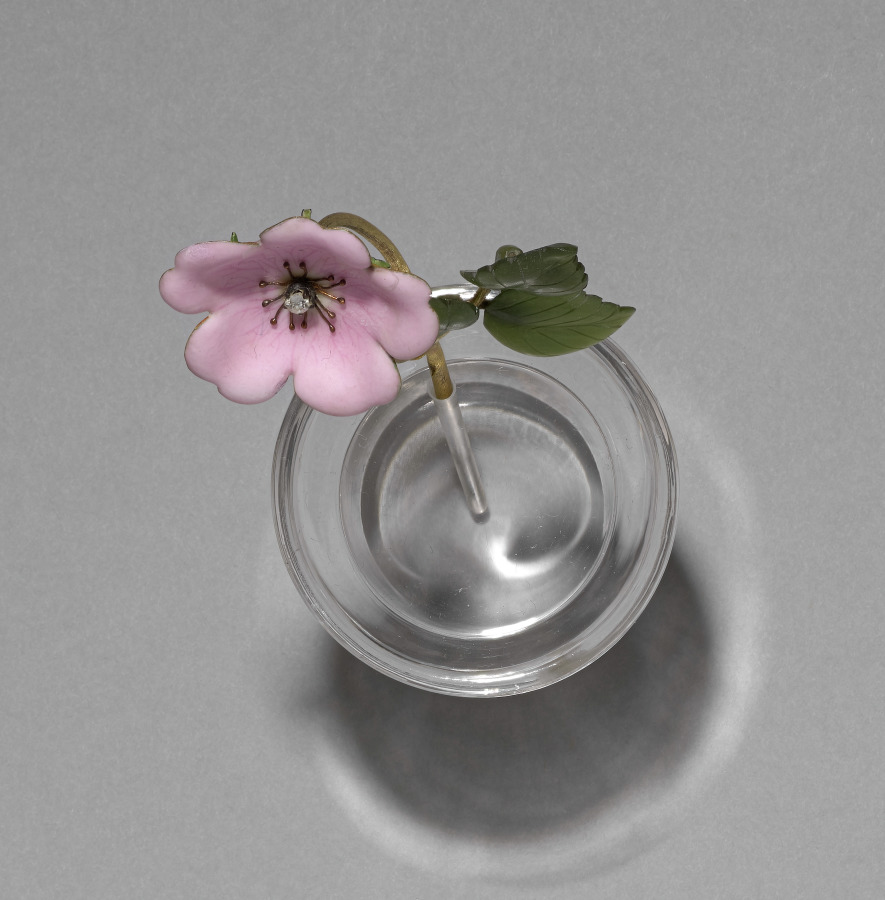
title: Flower Study of a Wild Rose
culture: Russia, St. Petersburg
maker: House of Fabergé (Russian, 1842–1918)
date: c. 1885–1915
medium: gold, silver, enamel, diamond, jade, rock crystal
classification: Miscellaneous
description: This delicate flower study resembles a stem of wild rose. Fabergé’s inspiration for his flower studies is said to have come from the floral brooches of precious stones that were made in the 1700s for Catherine the Great as well as from the Japanese art of flower arranging, known as ikebana. Small and delicate, Fabergé’s flower studies were given as intimate gifts to friends by the tsarina and others in the court. She also liked to take them around to wherever the imperial family was residing as a reminder of spring during the harsh Russian winters.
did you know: The stems of Fabergé’s flower studies are set into little basins carved from rock crystal to resemble pots of water.